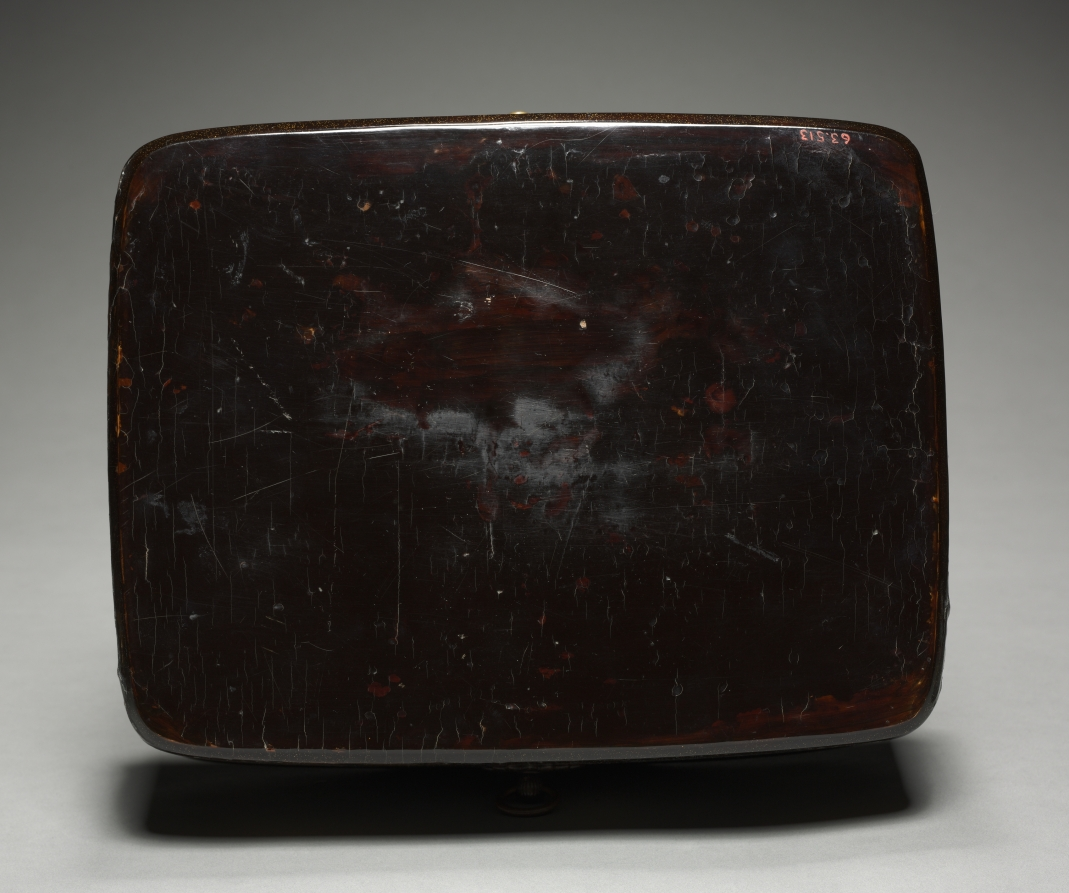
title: Cosmetics Box with Chrysanthemums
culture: Japan, Kamakura period (1185–1333)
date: early 1300s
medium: lacquer on wood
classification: Lacquer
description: In China, the chrysanthemum was historically appreciated for its association with the Double Nine Festival and the reclusive life of the poet Tao Yuanming (AD 365-427). In Japan, the 16-petaled chrysanthemum came to symbolize the Japanese imperial family after Emperor Gotoba (1180-1239) chose the motif as his personal emblem, having it applied to his sword and everyday utensils. This box proves that the flower also appeared on lacquer wares as early as the Kamakura period.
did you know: In Japanese, this type of small box is called a tebako, literally a hand box, and was typically part of a cosmetics set.